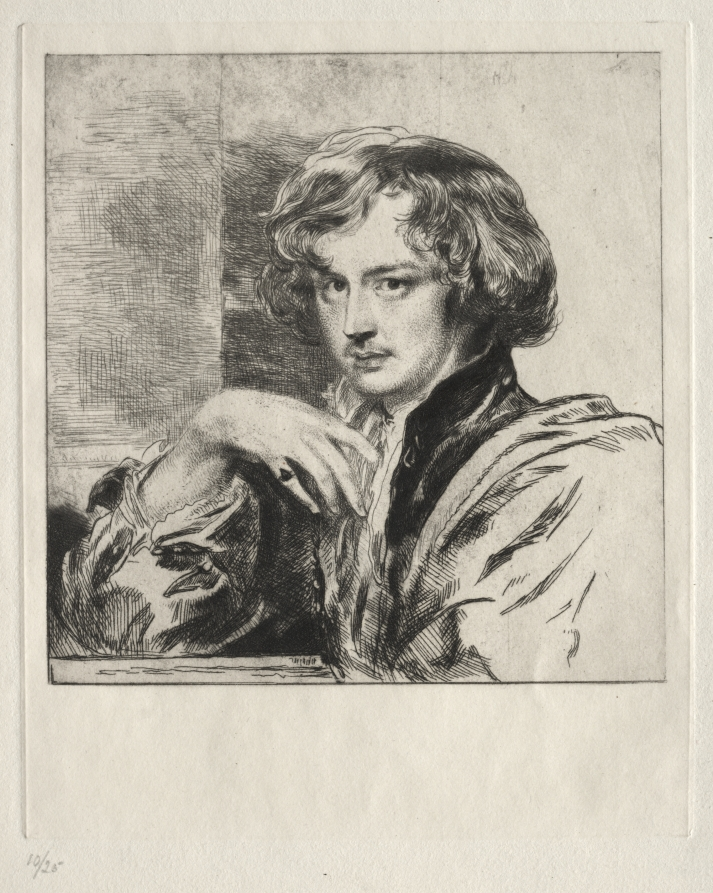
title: Van Dyck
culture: England, 19th century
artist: Andrew Geddes (British, 1783–1844)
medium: etching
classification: Print